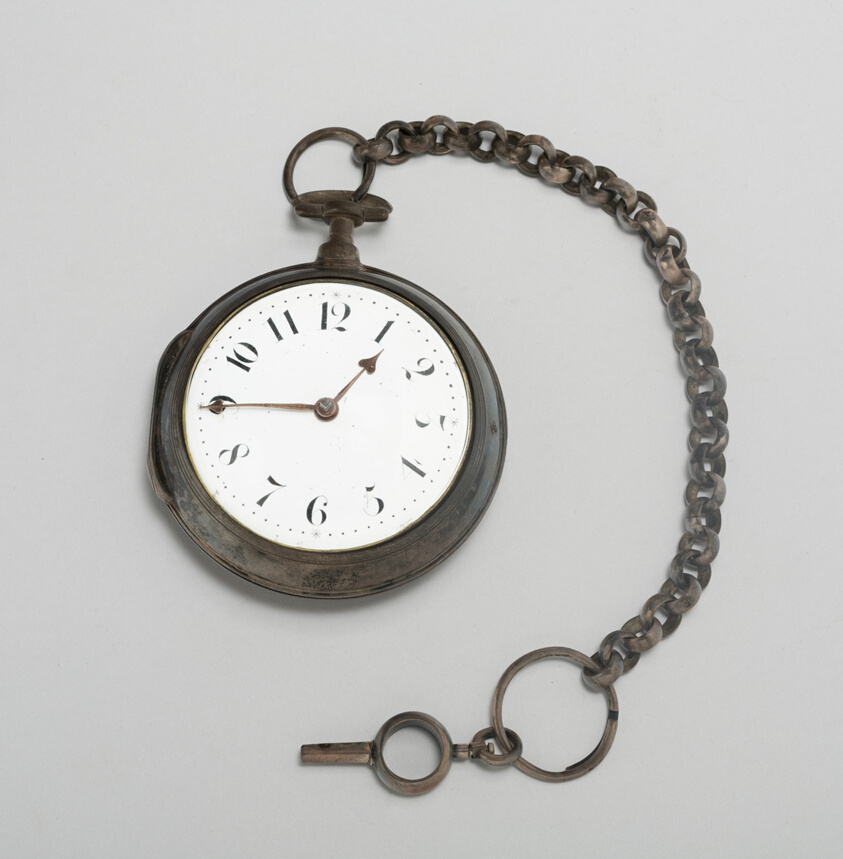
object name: Metalwork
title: Watch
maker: James Simpson; English, late 18th century; London, England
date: 1797/98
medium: Silver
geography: Lincoln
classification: silver; metal; watch; european decorative arts; metalwork